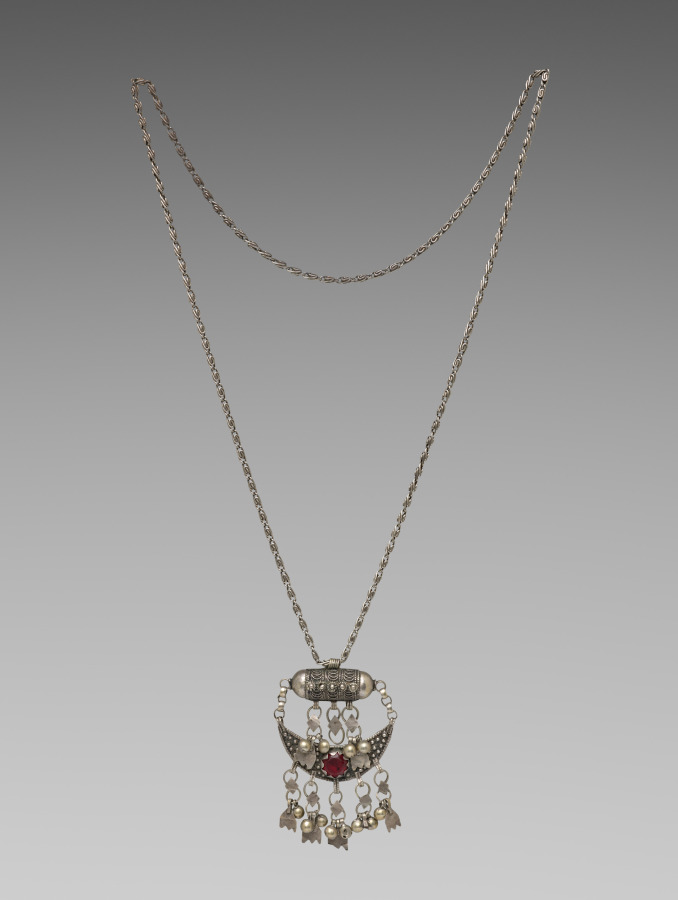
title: Necklace with pendant (waqari or wakari?)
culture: East Africa, probably Harar, Ethiopia, unknown silversmith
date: likely early to mid-1900s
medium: silver alloy, glass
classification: Jewelry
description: Ornate filigree jewelry was historically made in Ethiopia for royals and nobility by specialized silversmiths trained through long apprenticeships. This elaborate pendant necklace (waqari) probably made and worn in the Muslim city of Harar. Muslim women wore such massive jewelry, which holds aesthetic links to nearby Yemen. Its half-moon pendant is a protective crescent shape and its upper filigreed capsule is an amulet. The crescent symbol has existed as a talismanic form in Ethiopia since the Aksumite Empire (1–700s CE).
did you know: Silversmiths also made objects for religious and royal use, like crowns and crosses.